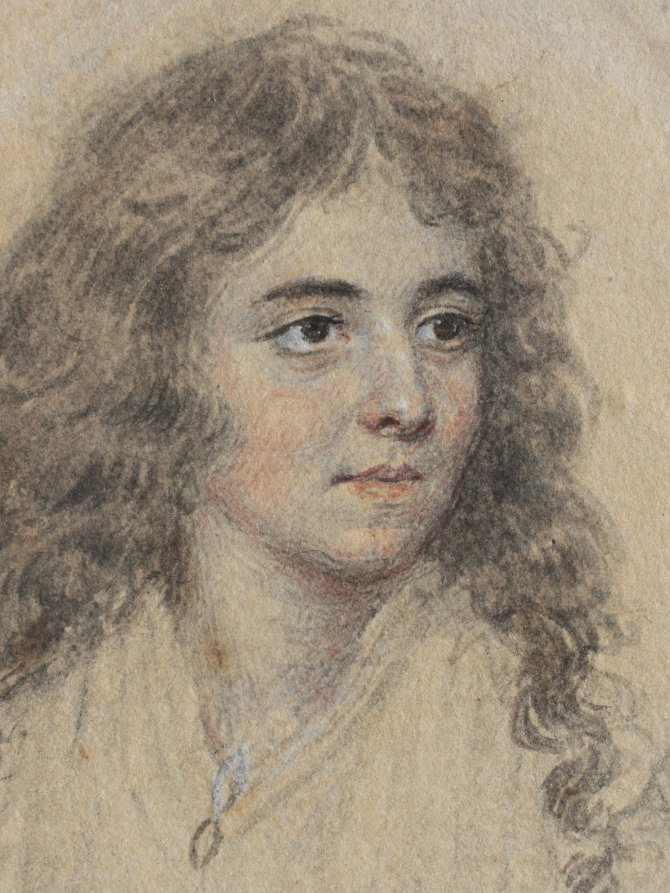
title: Portrait of Anna Maria Woolf, née Smart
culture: England, 18th century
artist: John I Smart (British, 1741–1811)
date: c. 1785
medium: graphite and wash on laid paper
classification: Portrait Miniature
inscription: Signature: none; inscribed on front of paper at upper right corner: 1[?][?]; inscribed on paper backing, in graphite at left center: Indi; upside down, at left above center: 38; inscribed in brown ink at center, on back of drawing: Mrs Peirce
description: Although it is impossible to say whether or not it was always part of the artist’s process to execute a preparatory sketch prior to painting each miniature, we do know that John Smart retained many hundreds of these sketches. A group of preparatory sketches—of which this portrait is one—descended through the Smirke family after Smart’s daughter Sarah gave a sketchbook containing preparatory portrait studies to her friend Mary Smirke, sister of the celebrated Victorian architect Sydney Smirke. This book was probably broken up around 1877 when it was divided between Sydney’s daughters Mary Jemmett and Mrs. Lange, whose portions were both sold at auction in 1928. This portrait was assigned the historically colorful but fictitious title of “Duchess Christina” at some point after memory of its true identity had been lost. Giving illustrious titles to portraits of unknown sitters was a popular strategy adopted by dealers during the nineteenth and twentieth centuries, often applied to miniature portraits and, in particular, to Smart’s sketches of women. Here, the sitter’s head is turned slightly to her left. She has dark brown eyes, rosy cheeks, and long, wavy dark hair falling below her shoulders. She wears a white dress with long sleeves and a ruffled bodice, and a small lozenge-shaped pendant around her neck. She is placed inside a faintly suggested oval, and the background is unpainted. The paper backing—removed in 1993—was inscribed with “38” and “Indi,” which may suggest that the sketch was executed during Smart’s time in India. The inscription that was discovered on the back of the drawing after the paper backing was removed reads, “Mrs [or perhaps Miss] Peirce.” Although the inscription appears to be in the artist’s hand, and in the brown ink he used to annotate his preparatory sketches, its relationship to this portrait is unclear. The sitter is probably Anna Maria, Smart’s eldest daughter by his first wife, whose name is unknown. Anna Maria (1766–1813) traveled with her father to India in 1785, sailing from England on April 19 and arriving in Madras on September 6. If the work was executed in India at the time Anna Maria accompanied her father there, the sketch may be dated to around 1785, the year they moved to the subcontinent. Anna Maria would have been around 18 years old. The fact that this portrait is of an older girl who dons a plain, modest dress and wears her hair down suggests an intimacy not found in the type of portraits Smart commonly executed of women wearing fine gowns and elaborately dressed hair.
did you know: After living in India for many years, Anna Maria was en route to England when she was forced to disembark at St. Helena to give birth to her son.